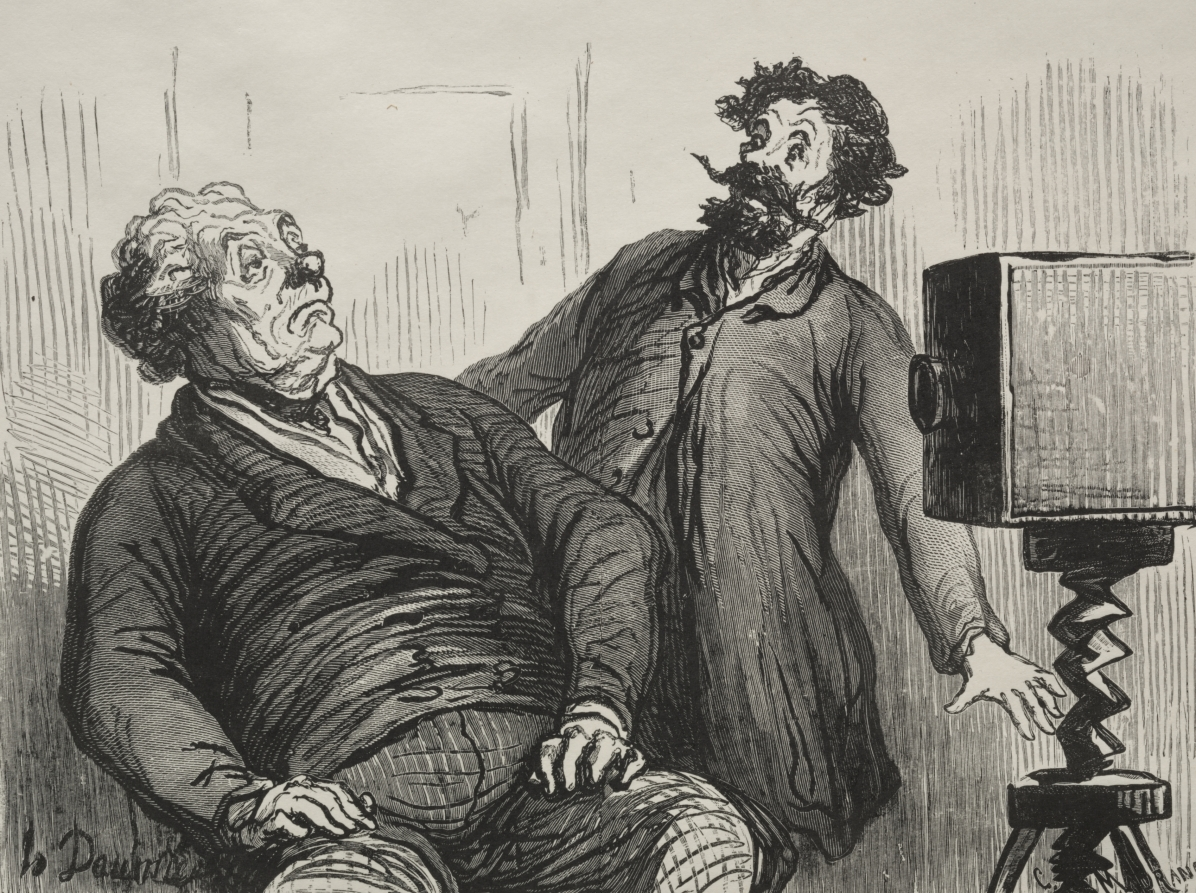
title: Photographers and Photographed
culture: France, 19th century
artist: Honoré Daumier (French, 1808–1879)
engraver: Charles Maurand (French, 1824–1904)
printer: François Louis Schmied (Swiss, 1873–1941)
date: 1862, printed 1920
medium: wood engraving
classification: Print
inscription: Lower margin, pencil: 68/75 ; red stamp: FLS